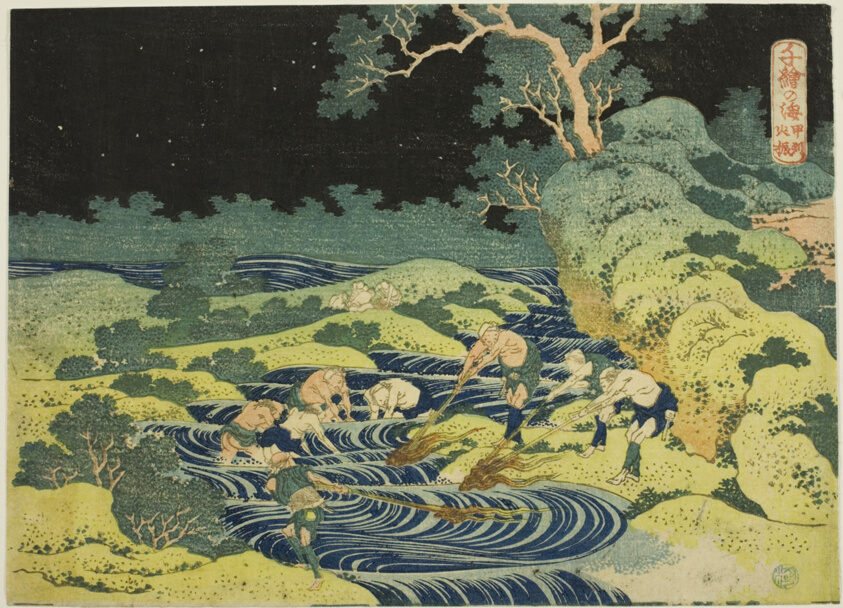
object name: Print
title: Fishing by Torch in Kai Province (Koshu hiburi) from the series "One Thousand Pictures of the Ocean (Chie no umi)"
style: Japanese (culture or style)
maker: Katsushika Hokusai 葛飾 北斎; Japanese, 1760-1849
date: c. 1833/34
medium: Color woodblock print; chuban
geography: Japan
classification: print; asian art